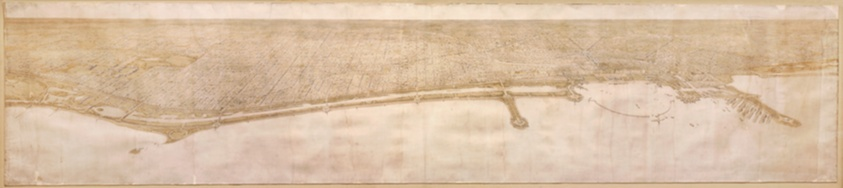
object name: Architectural Drawing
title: Plate 49 from Plan of Chicago 1909: Chicago. View of the City from Jackson Park to Grant Park, Looking Towards the West. The proposed shore treatment as a park enclosing a waterway (or a series of lagoons) is shown, together with the enlarged yacht harbor, recreation piers, and a scheme for Grant Park.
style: 20th Century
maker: Daniel Hudson Burnham, American, 1846-1912; Edward Herbert Bennett, American, born England, 1874-1954; Jules Guerin, delineator, American, 1866-1946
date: 1907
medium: Watercolor with graphite on cream wove paper, discolored to tan, laid down on canvas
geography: Chicago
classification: paper; watercolor; architectural drawing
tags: Chicago, architecture, architectural drawing, drawing, harbor, horizon, illinois, lake, park, pier, plan, shore